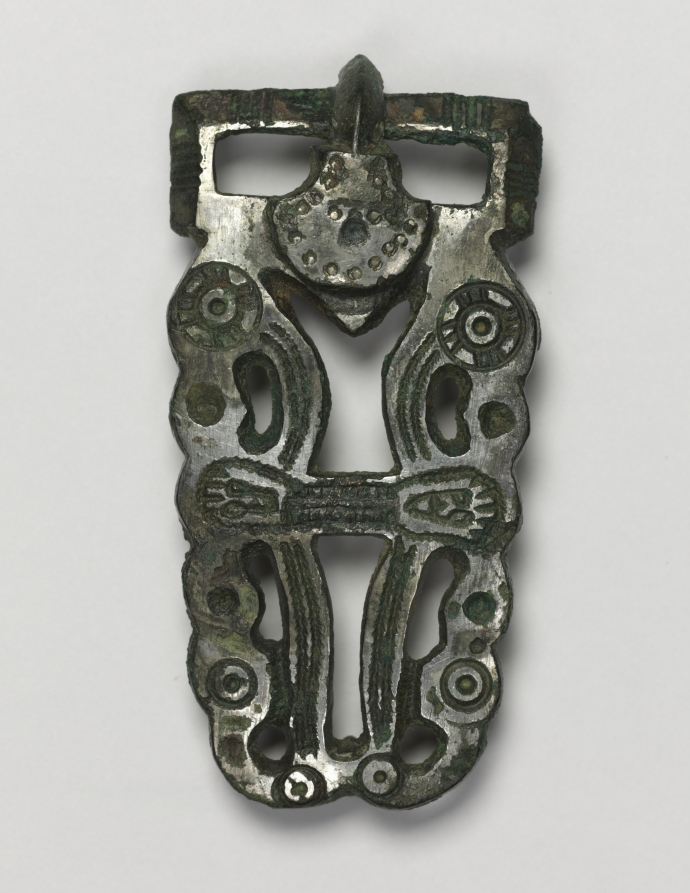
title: Buckle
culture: Frankish, Migration period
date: 600s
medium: bronze and silver overlay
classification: Jewelry